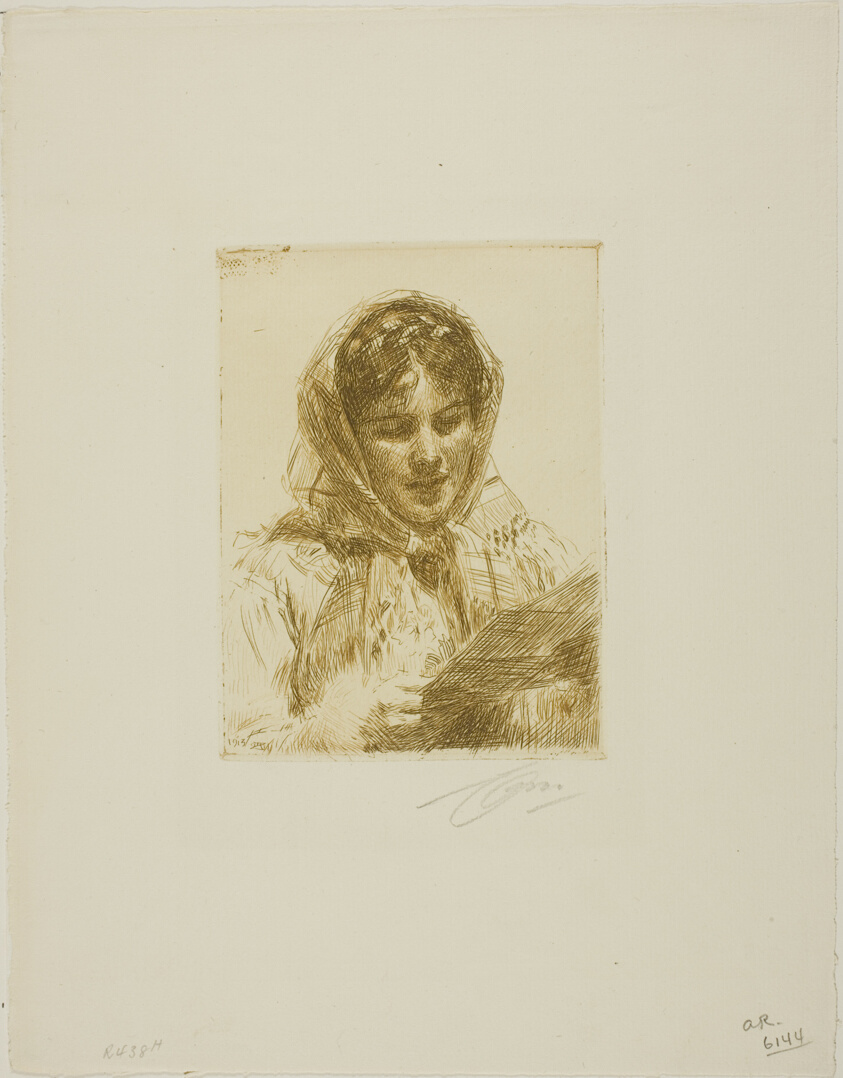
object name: Print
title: The Letter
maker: Anders Zorn (Swedish, 1860-1920)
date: 1913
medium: Etching on ivory laid paper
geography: Sweden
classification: etching; print; prints and drawing